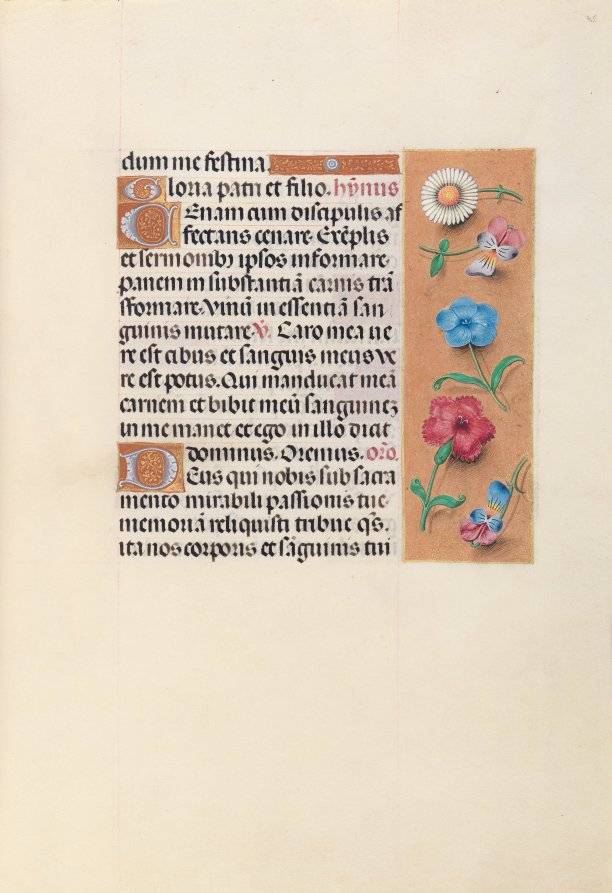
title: Hours of Queen Isabella the Catholic, Queen of Spain: Fol. 45r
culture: Flanders, Ghent and Bruges, late 15th century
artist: Master of the First Prayerbook of Maximillian (Flemish, c. 1444–1519)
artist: and Associates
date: c. 1500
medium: ink, tempera, and gold on vellum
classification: Bound Volume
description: This manuscript was illuminated by a circle of at least five highly organized manuscript painters active in the Flemish cities of Ghent and Bruges. The principal illuminator was Alexander Bening, who painted the majority of the book's miniatures. Manuscripts produced by this circle of artists are renowned for the decoration of their borders, which typically feature a rich variety of realistically-painted flowers, birds, and butterflies. This prayer book, called a book of hours, was intended not for a cleric, but for the private devotions of a lay person-in this case, Isabella the Catholic, Queen of Spain (1451-1504). Isabella's coat of arms embellishes the book's frontispiece. It is unlikely that the book was commissioned by the Queen herself; rather, she probably received it as a diplomatic gift from someone courting her patronage, perhaps Cardinal Francisco Jimenez de Cisneros. A Franciscan friar, Jimenez was dependent upon Isabella for his advancement, first to the post of Queen's confessor in 1492, and then to Archbishop of Toledo in 1495.